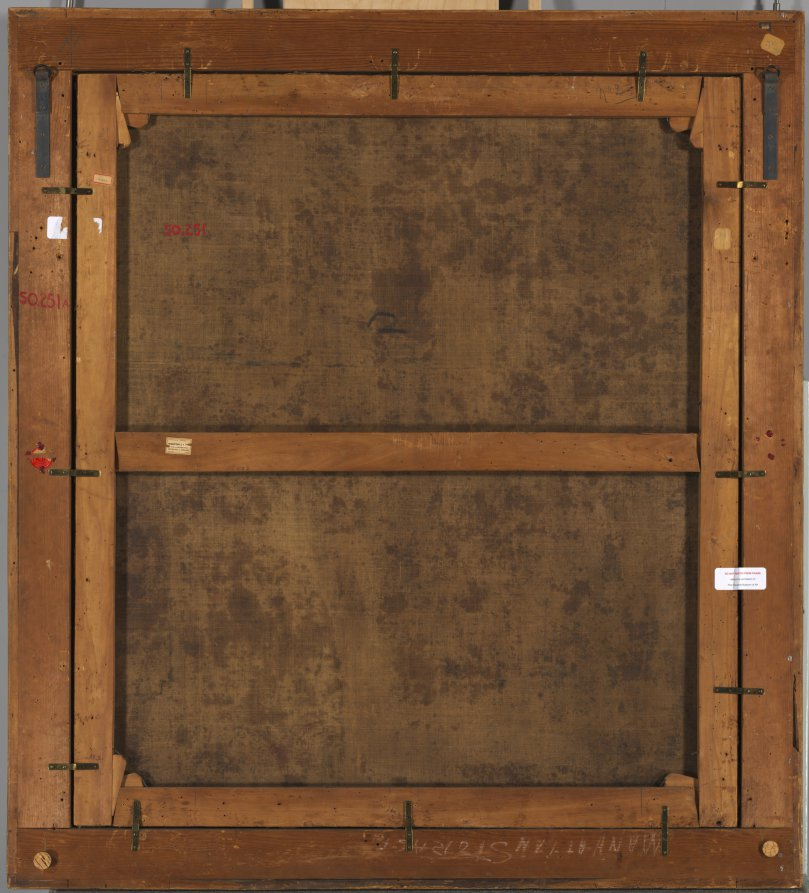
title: The Annunciation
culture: Italy, 16th century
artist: Paolo Veronese (Italian, 1528–1588)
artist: and Workshop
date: c. 1580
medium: oil on canvas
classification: Painting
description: Although Veronese is best known for his large-scale, pageant-like presentations, here the artist has taken the narrative of the Annunciation (the announcement of the angel Gabriel to the Virgin Mary that she would conceive and bear a son) and compressed the figures close to one another, creating a startling intimacy. According to a tradition established by the medieval writer Saint Bernard, Mary has been reading from the Old Testament prophecy of Isaiah (7:14), "A young woman is with child and she will bear a son."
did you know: The white lilies held by Gabriel are a symbol of Mary's purity and innocence, often appearing in depictions of the Annunciation.